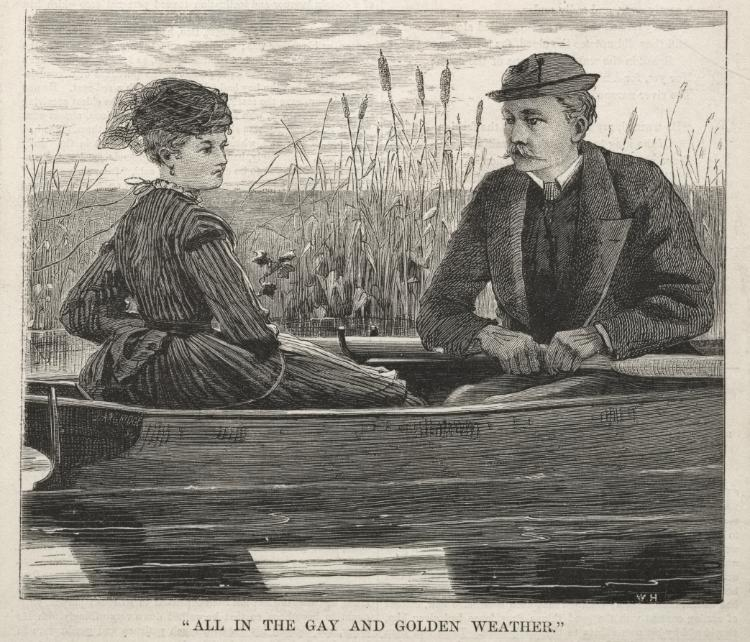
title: "All in the Gay and Golden Weather"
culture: America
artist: Winslow Homer (American, 1836–1910)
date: 1869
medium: wood engraving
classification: Print